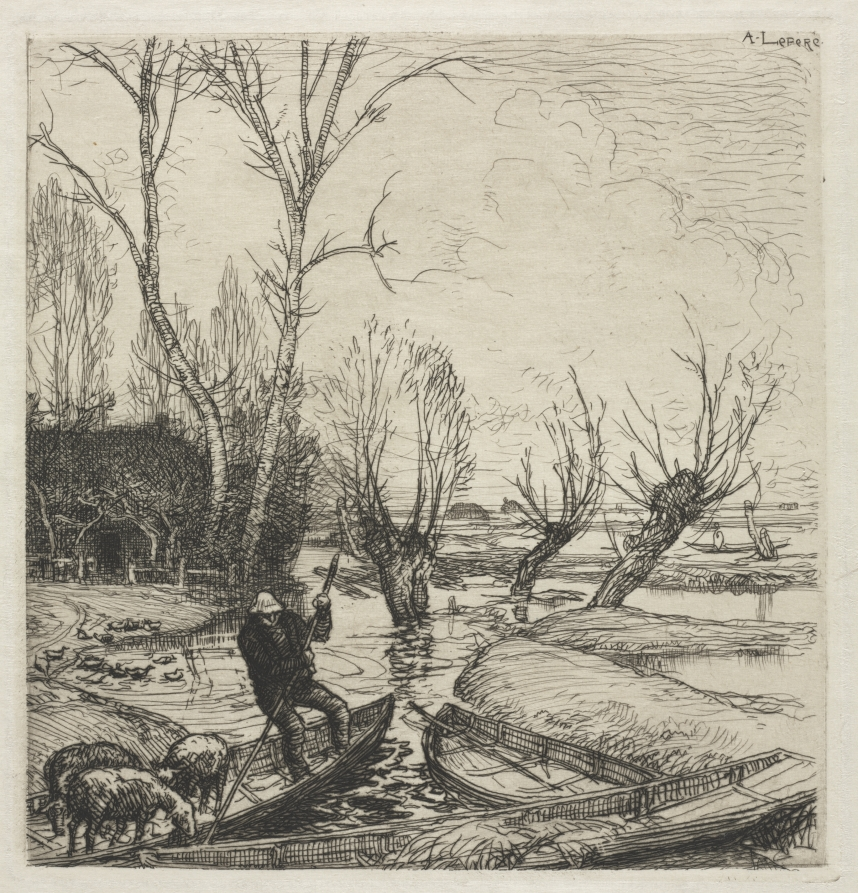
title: [Man in a Boat with Three Sheep]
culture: France, 19th century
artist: Auguste Louis Lepère (French, 1849–1918)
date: c. 1870–1918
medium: etching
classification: Print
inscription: upper right, in plate: A Lepere